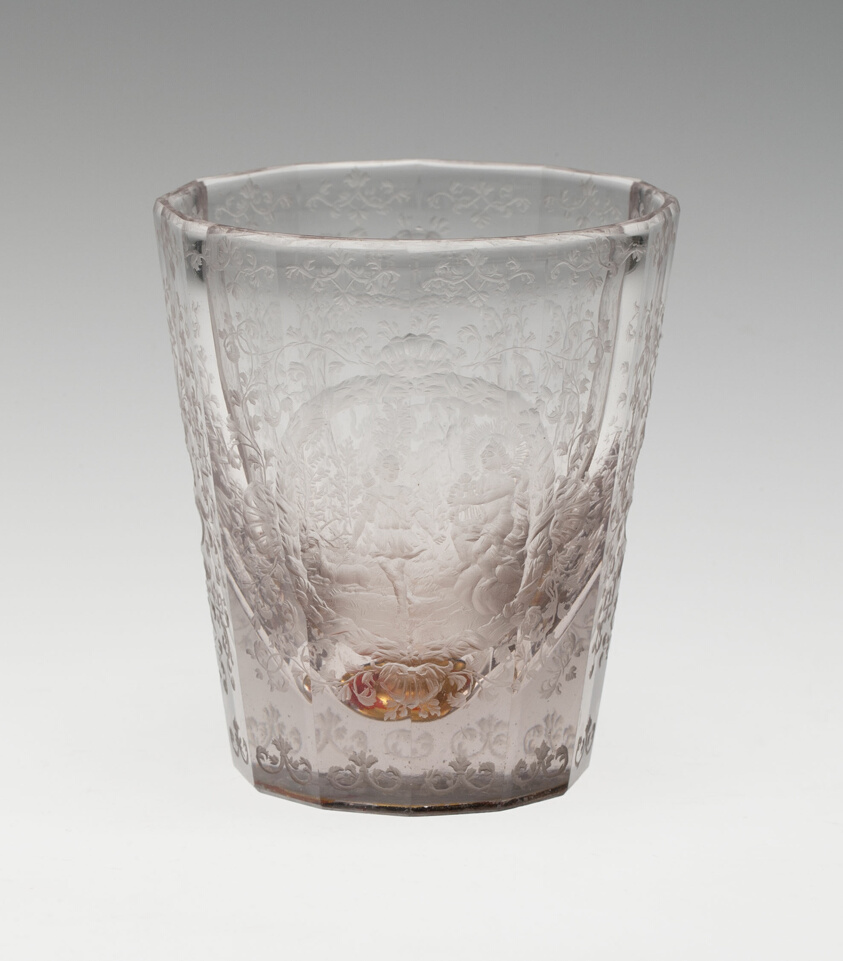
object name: Glass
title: Beaker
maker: Bohemia, Czech Republic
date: c. 1710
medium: Glass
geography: Bohemia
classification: drinking vessel; glass; european decorative arts